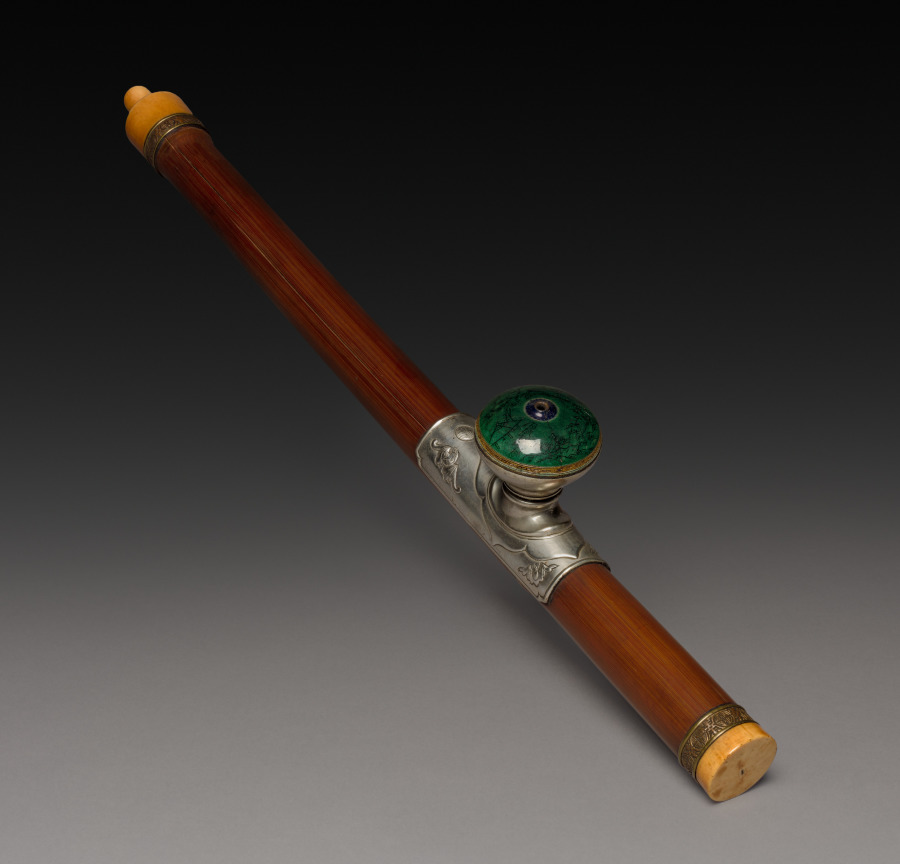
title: Opium Pipe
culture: China, Qing dynasty (1644-1911)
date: 1800s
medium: wood with ivory and silver decoration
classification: Miscellaneous